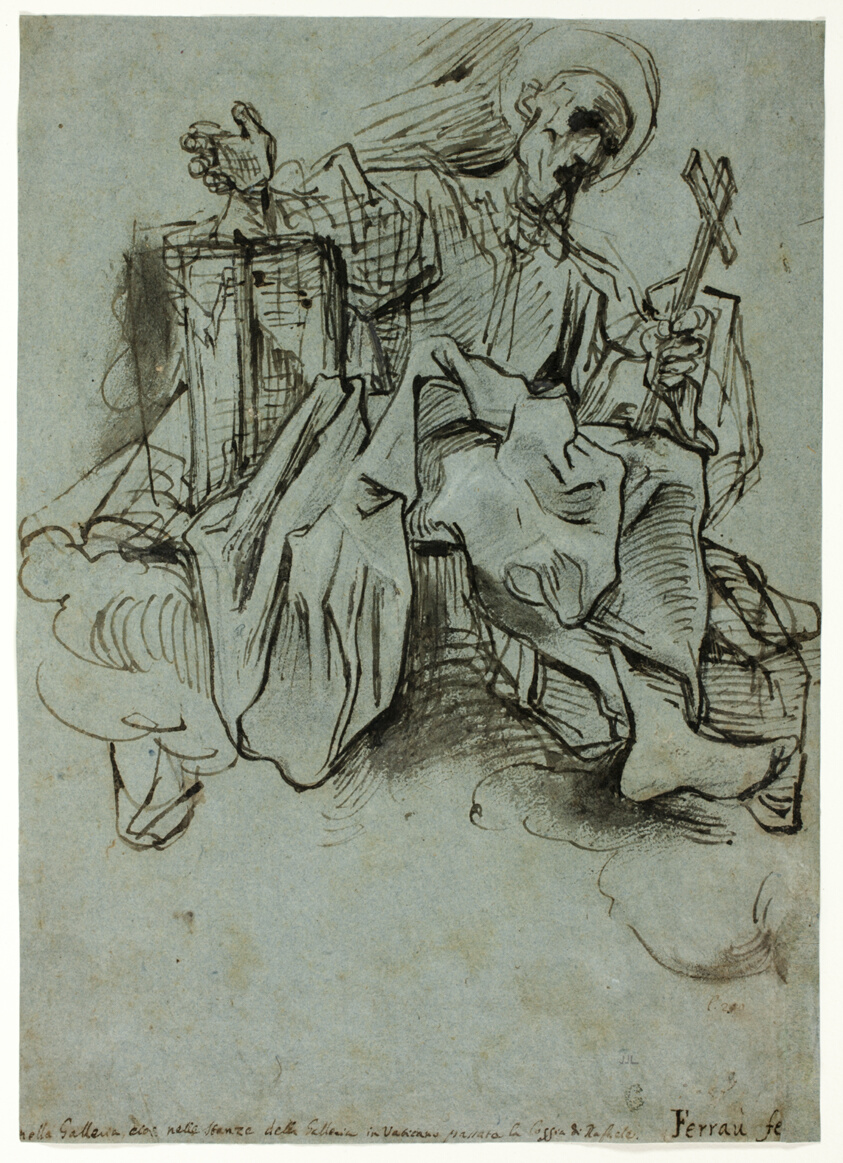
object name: Drawing and Watercolor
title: Saint with Book and Cross Seated on a Cloud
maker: Ferraù Fenzoni; Italian, 1562-1645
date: c. 1591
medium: Pen and black and brown ink, with brush and brown wash, with traces of black chalk, on blue laid paper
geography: Italy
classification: ink with wash; drawings (visual works); prints and drawing